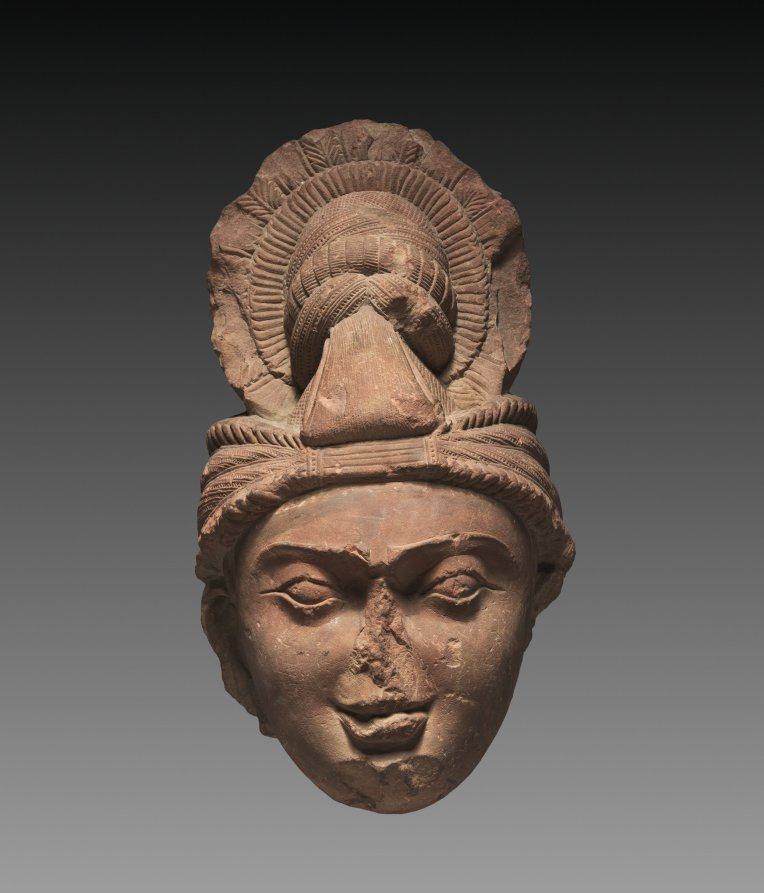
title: Head of a Bodhisattva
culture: India, Mathura, Kushan period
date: 75–early 100s CE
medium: red sandstone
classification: Sculpture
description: This monumental male head must have originally belonged to a larger-than-life Bodhisattva image. The imposing turban is of the type worn by royalty, divinities, and nobility during the Kushan period from the first through third century. The round, fleshy face, heightened by a subtle smile, retains the powerful quality of early Kushan and pre-Kushan images of nature divinities, known as yakshas.